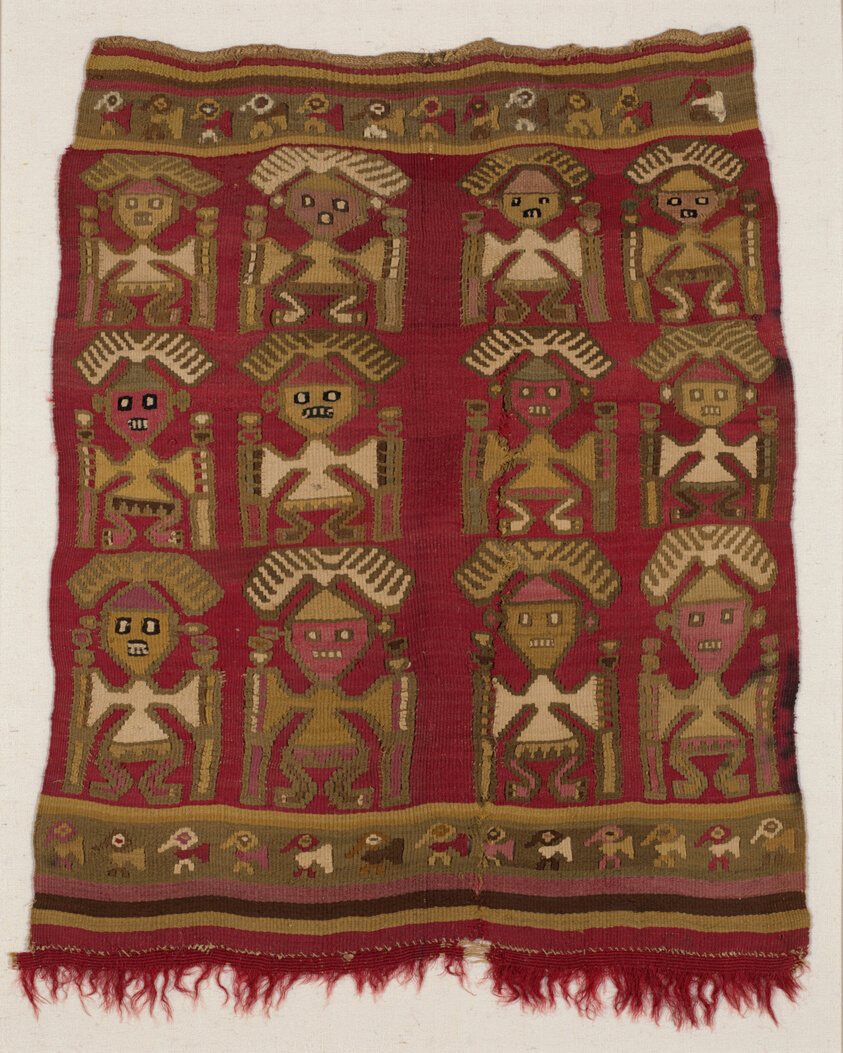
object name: Costume and Accessories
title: Fragment (Loincloth)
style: chimú, late intermediate period, Pre-Columbian, americas, andean, andes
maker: Chimú (Peru, Probably north coast)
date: A.D. 1250/1470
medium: Cotton and wool (camelid), slit tapestry weave; edged with plain weave extended weft cut fringe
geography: Peru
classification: costume - weaving; weaving; sampler; textile; costume; garment; costume component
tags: abstract figures, abstract forms, animals, birds, grids, headdresses, Male, staffs, stepped motif